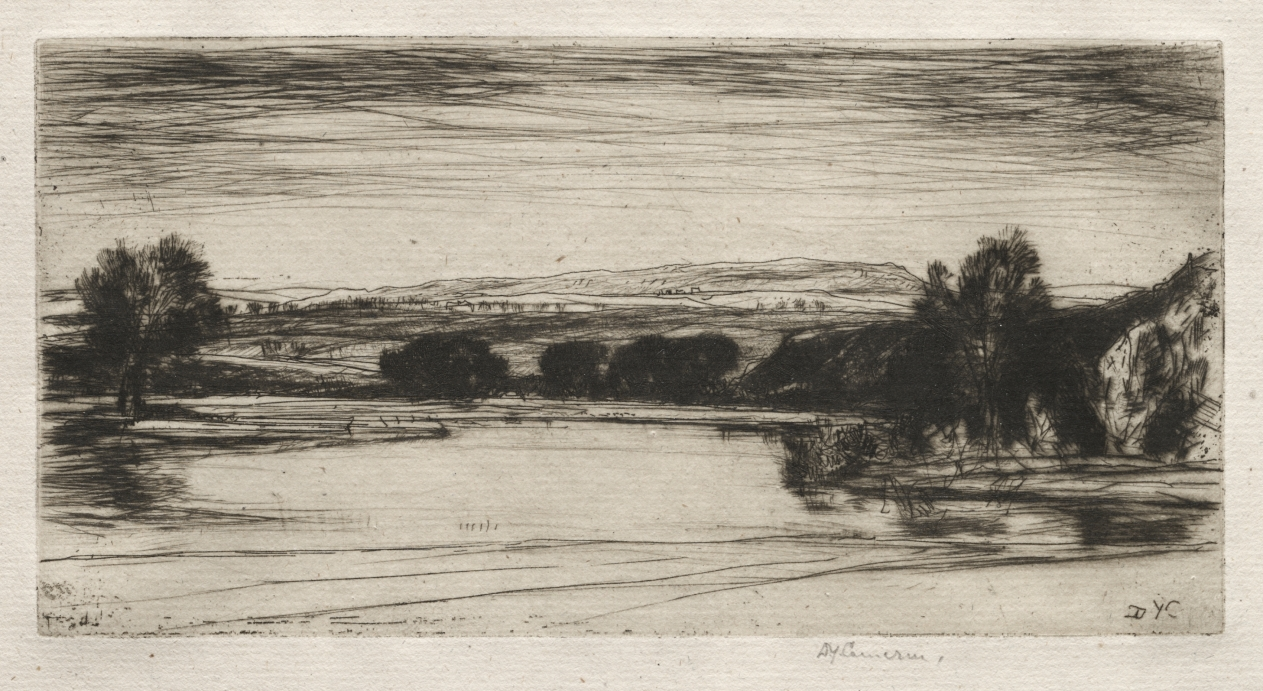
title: The Lochan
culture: England, 20th century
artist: David Young Cameron (British, 1865–1945)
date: 1914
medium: etching and drypoint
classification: Print